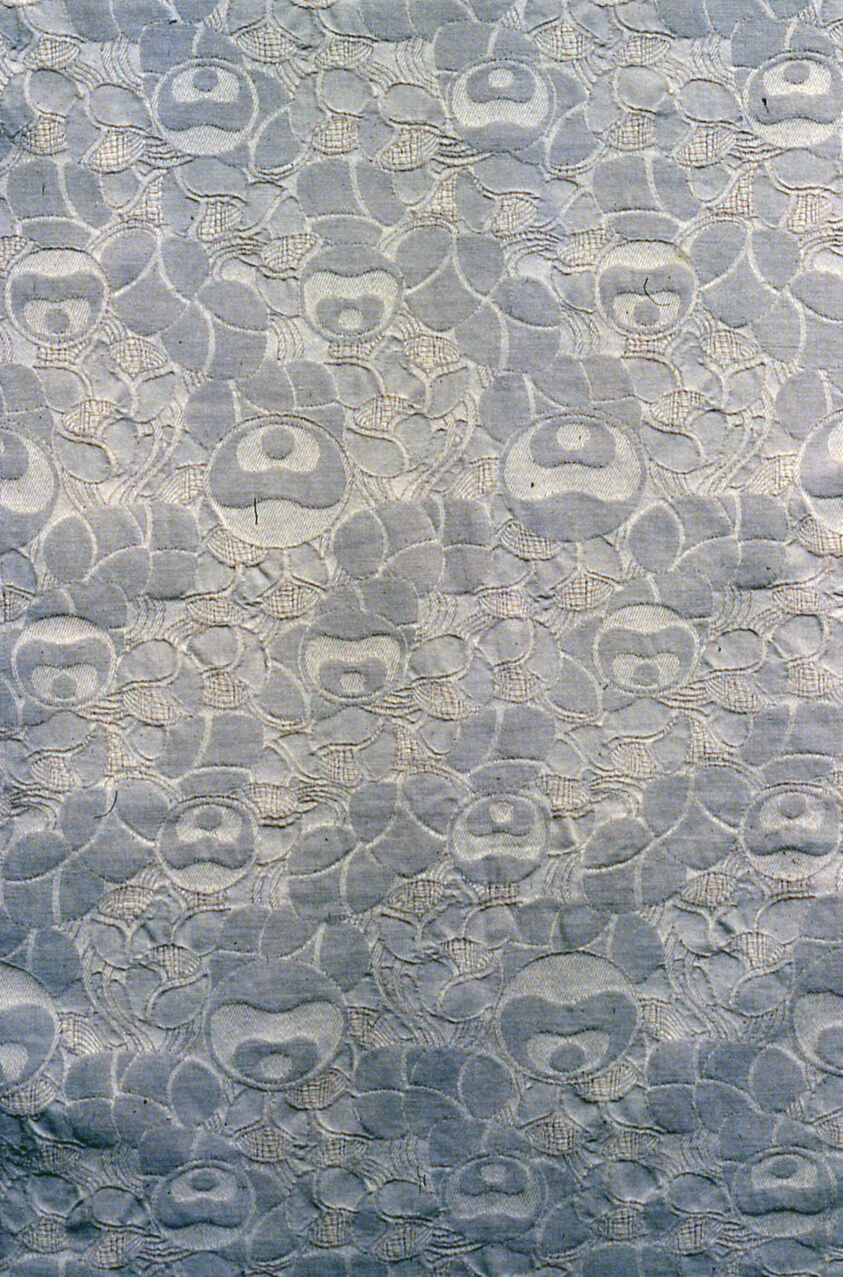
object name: Textile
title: Hafis (Dress or Furnishing Fabric)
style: Modernism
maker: Designed by Koloman Moser (Austrian, 1868–1918); Produced by Johann Backhausen & Söhne (Austrian, 1849-2012); Austria, Vienna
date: 1899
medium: Cotton, satin weave self-patterned by areas of twill and plain weaves; woven on loom with Jacquard attachment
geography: Vienna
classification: textile; weaving; furnishing textile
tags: floral, flowers, vines